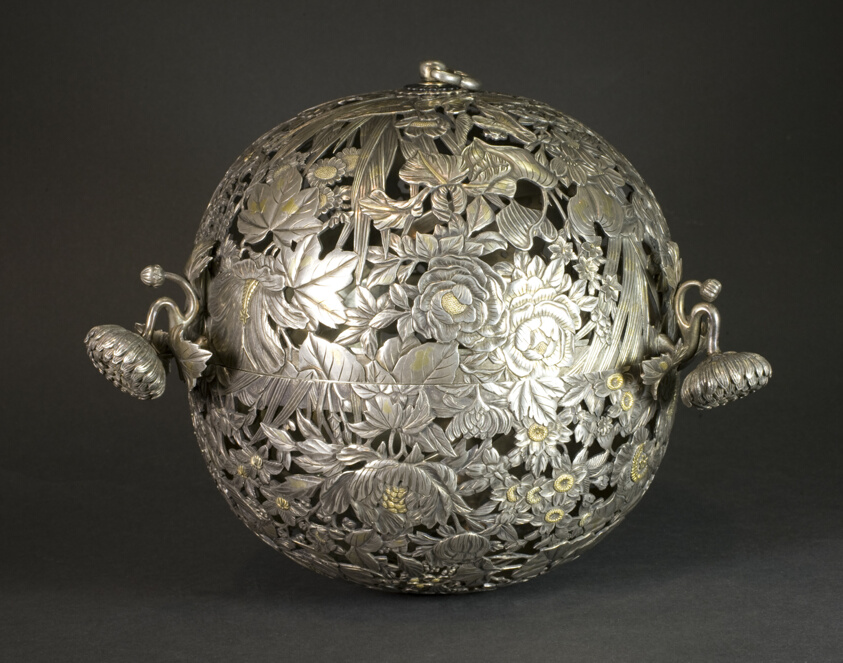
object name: Decorative Arts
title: Hanging Incense Burner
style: Japanese (culture or style)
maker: Japanese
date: 19th century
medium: Silver, gold, silk cords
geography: Japan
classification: incense burner; decorative arts